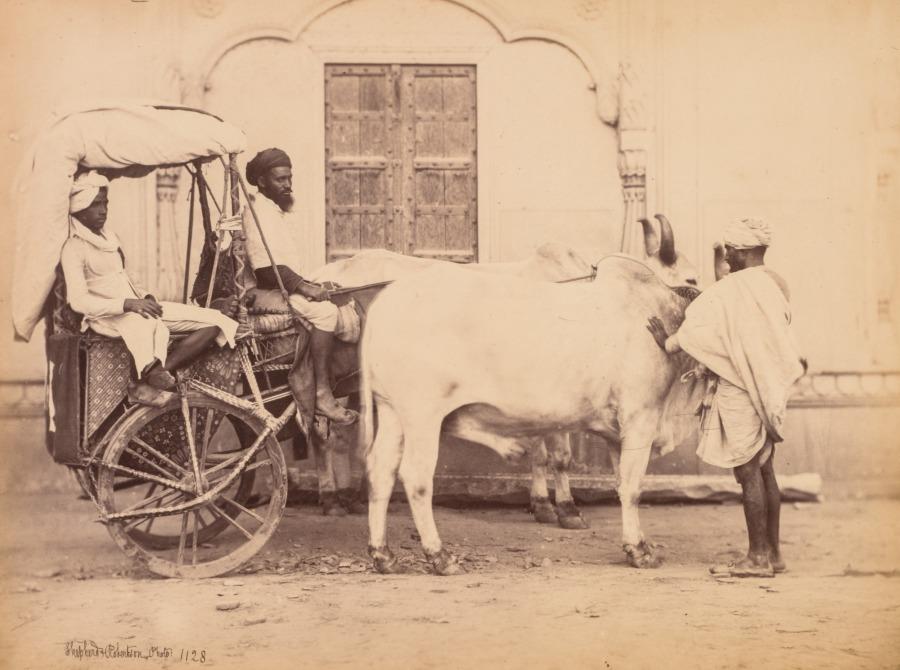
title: Bullock Cart, Delhi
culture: India, 19th century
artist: Shepherd & Robertson (British, active Agra and Shimla, 1862–1864)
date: 1863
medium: Albumen print from glass plate negative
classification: Photograph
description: The bullock cart, an ancient and once prevalent means of transportation in India, is still widely used in rural areas today. Here, a driver and his staff wait for a passenger. This occupational image, created by British colonial photographers for European audiences, offered armchair travelers a European view of local Indian life and customs.